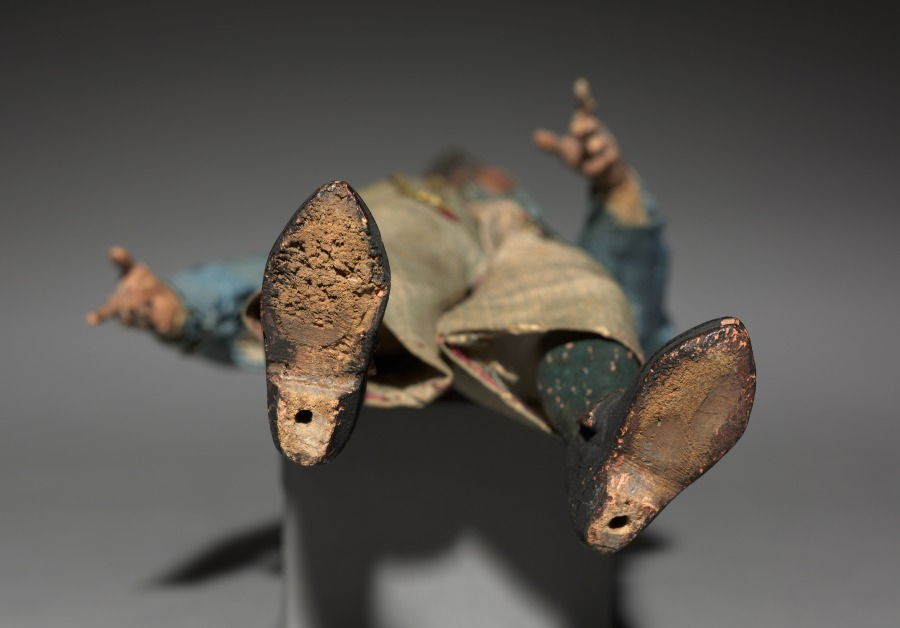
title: Figure from a Crèche: Standing Man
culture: Italy, Naples, late 18th-early 19th century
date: 1780–1830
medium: painted wood and terracotta with various textiles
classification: Sculpture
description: The practice of creating scenes of the Nativity for the home dates from the early 1700s in Italy, where people began to set up doll-like figures of about a foot or less in height. The custom was particularly popular in Naples around 1800, where crèche scenes (crèche means cradle, or crib) included many figures, whose heads and hands of painted terracotta, stuffed cloth bodies, and clothing adapted from contemporary local costumes gave them an amazingly realistic character. Representations of the birth of Jesus can be traced to the first few centuries of Christianity. Both living creatures and sculptural depictions of them were used from early times. By the late middle ages it was customary to create life-size figures of wood or stone, naturalistically painted, to represent the characters who participated in the events of Jesus's early life. These sculptures were then arranged in scenes illustrating one or both of the most important of these events, the Adoration of the Shepherds and the Adoration of the Magi—the three kings from the East who came to pay homage to the Christ child. Used in churches, these large figures were especially popular in Italy, Central Europe, Spain, and Portugal.